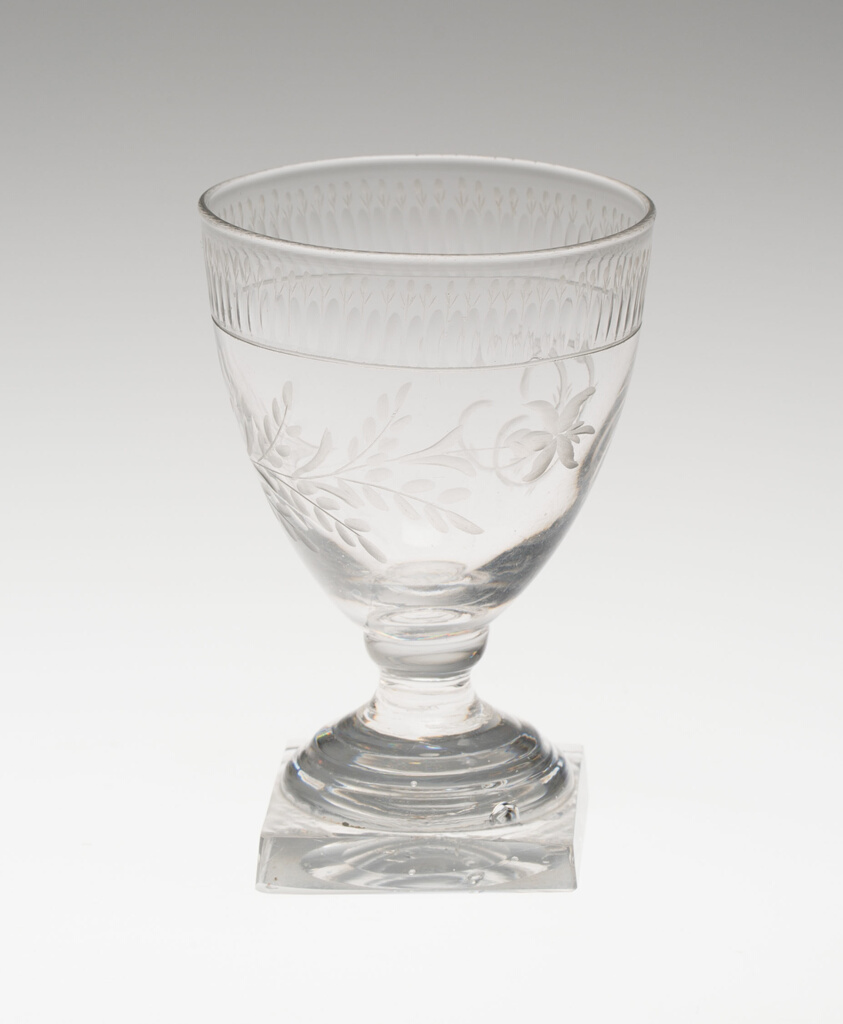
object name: Glass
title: Sweetmeat Glass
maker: England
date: c. 1790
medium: Glass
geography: England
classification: glass